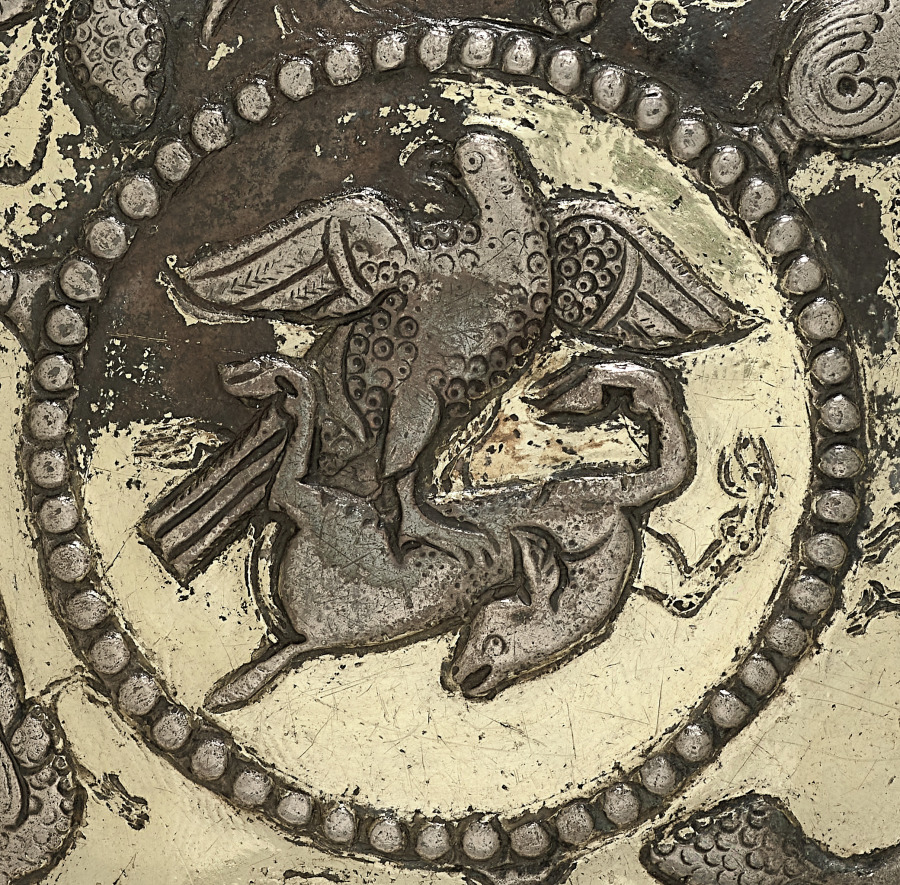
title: Bowl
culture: Iran, Sasanian Empire (224–651 CE)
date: 500–700 CE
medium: silver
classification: Metalwork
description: Every good Zoroastrian was supposed to spend one-third of his day farming; one-third philosophizing; and one-third eating, resting, and at pleasure. The abundance of Sasanian luxury goods is evidence of the importance accorded the last third of the day.